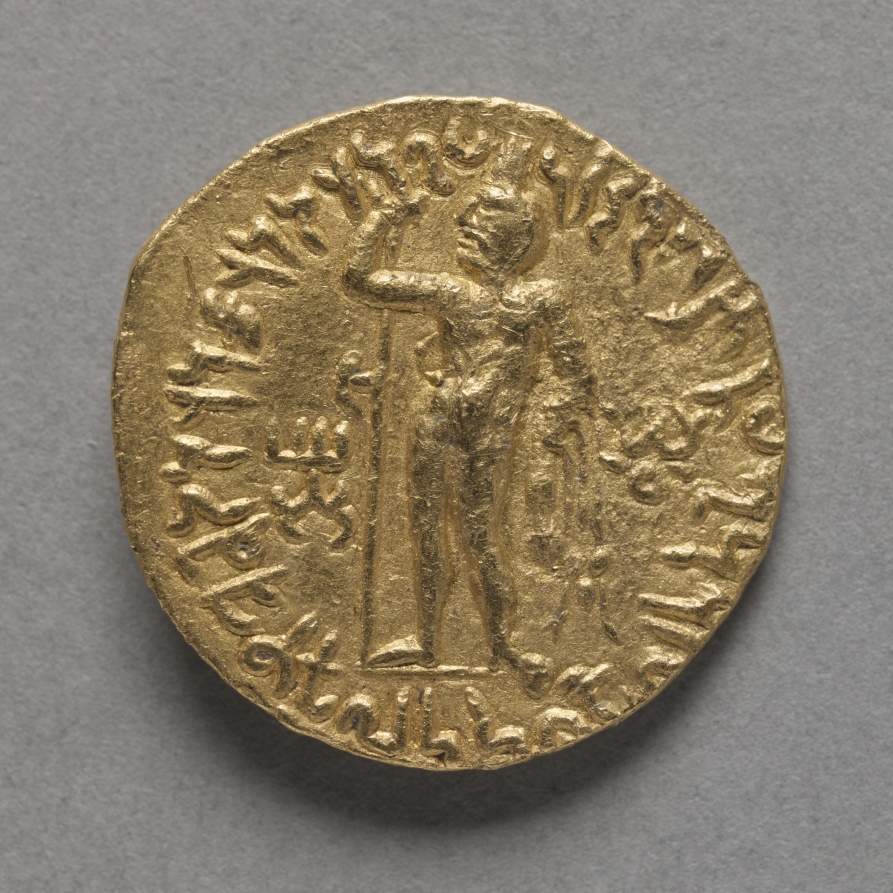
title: Vima Kadphises (reverse)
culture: India, Mathura, Kushan period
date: 50–78 CE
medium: gold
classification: Coins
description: The reverse depicts the figure of Hercules with the skin of the Nemean lion draped over his forearm and the lion's scalp also worn over his head. The Kushans primarily identified with Zoroastrian religious practice, but imagery on their coins and the religious groups they sponsored suggest they were ecumenical--open to supporting a wide range of sects.